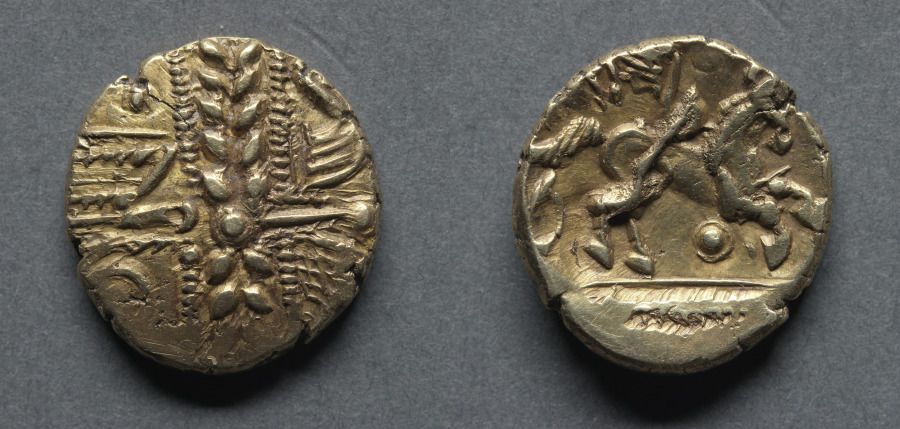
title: Stater: Wreath, Cloak, and Crescents (obverse); Horse and Wing Motif (reverse)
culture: England, Catuvellauni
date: c. 60–20 BCE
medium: gold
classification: Coins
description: This particular type of stater received its type name, Whaddon Chase, from a hoard of over 320 such pieces which were turned up by a plow in a field called Narbury on the Whaddon Hall estate, Buckinghamshire, on February 14, 1849. The surrounding countryside is known as Whaddon Chase, the name still in use today. This area is well within the territory of the Catuvellaunia.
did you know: The fortunes of the Catuvellauni and their kings can be traced through ancient coins.